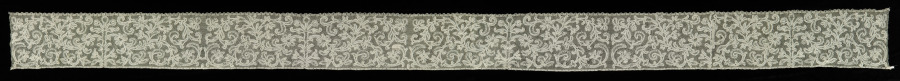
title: Lace Flounce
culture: Italy, Milan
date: 1700s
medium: Bobbin lace (Punto di Milano)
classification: Lace